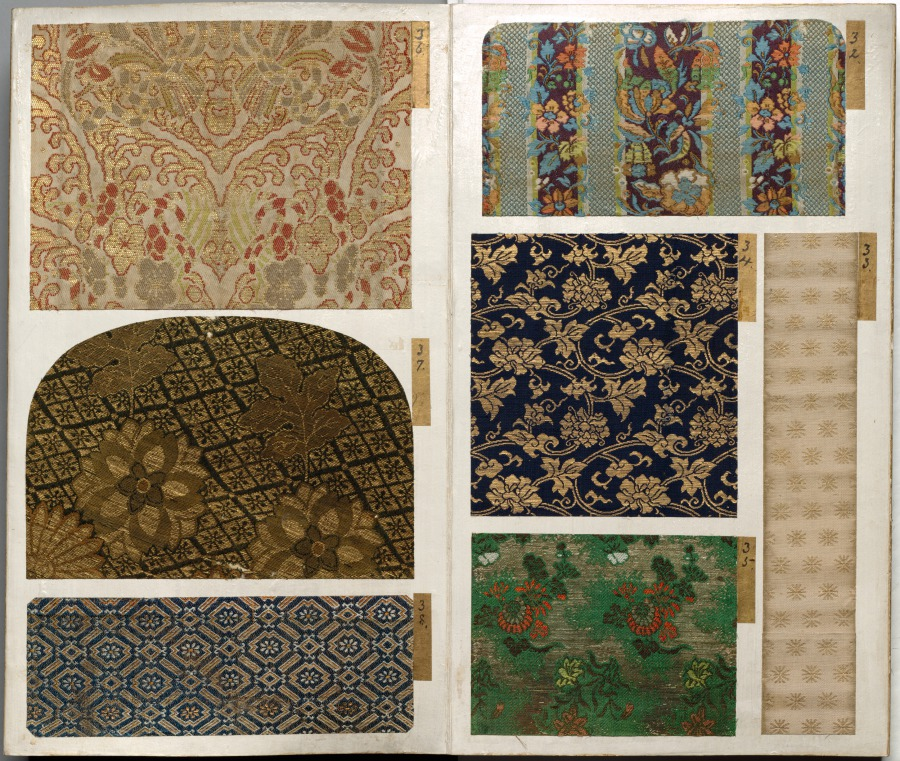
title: Album of Textile Samples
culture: Japan, Edo period (1615–1868)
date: 1600s-1700s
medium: silk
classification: Textile